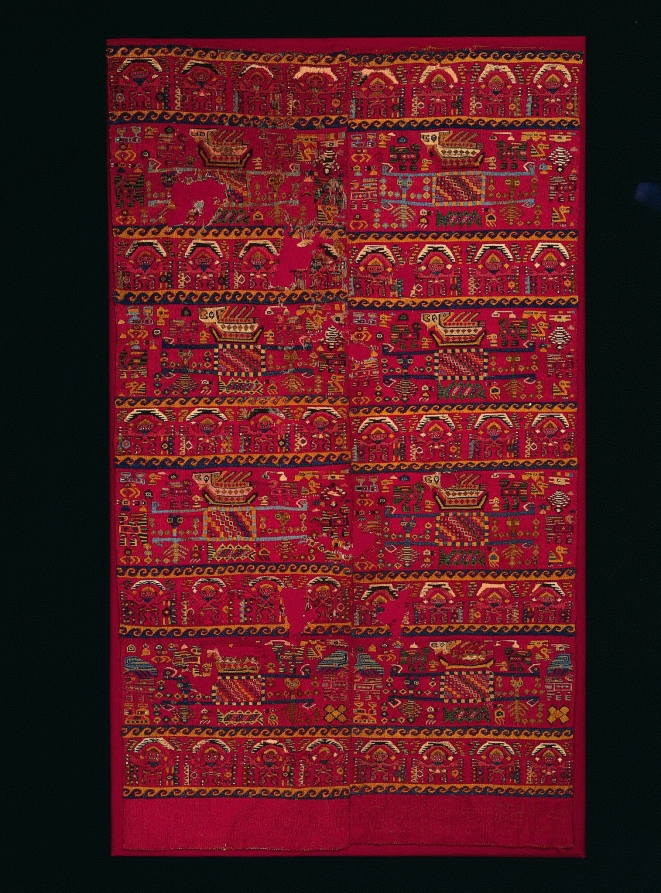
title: Two Tapestry-woven Panel Fragments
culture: Central Andes, North Coast, Chimú people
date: 1000–1460s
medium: camelid fiber and cotton, tapestry weave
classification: Tapestry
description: These two fragments, mounted side-by-side, come from the Chimú (chee-moo) Empire of Peru’s north coast. Each features horizontal rows containing four frontal figures. The rows alternate with wider registers, each with an H shape that represents a litter seen from above. A form of transport reserved for only the most esteemed members of society, the litter would have been carried by human porters via poles at each corner. Scattered around each are small creatures, including birds, a fish (located beneath), and two insect-like creatures posed as if they were carrying the litter. The objects hovering above the litter have not been identified.